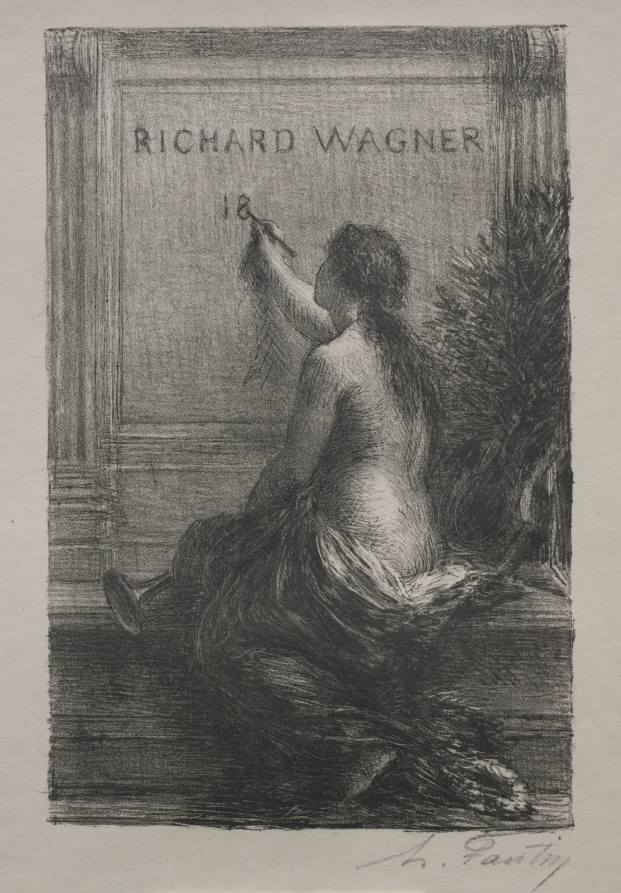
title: Immortality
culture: France, 19th century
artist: Henri Fantin-Latour (French, 1836–1904)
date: 1886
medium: lithograph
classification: Print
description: "Wagnerism"—the fascination with Richard Wagner’s music and aesthetic theories—was ignited in Paris in 1861 with the premier of Tannhäuser, an opera so controversial that it was forced to close after the third performance. Wagner’s concept of the gesamtkunstwerk, the total work of art in which all the arts were to be equal and united, sparked the imagination of artists and writers of the period. Fantin-Latour in particular dedicated himself to transferring the suggestive powers of music to his graphic work.